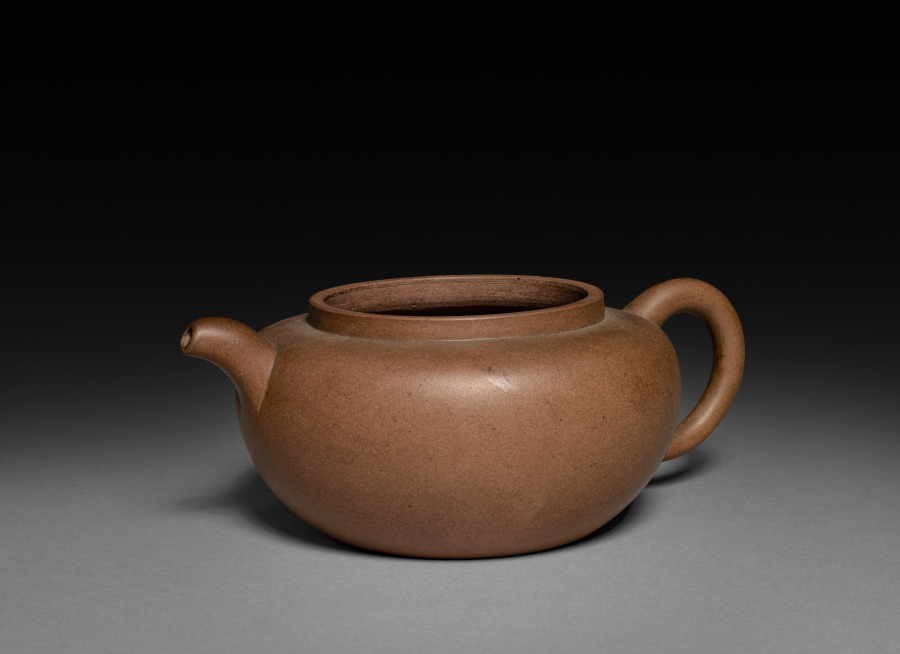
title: Teapot: Yixing ware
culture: China, Qing dynasty (1644-1911)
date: 1644–1911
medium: stoneware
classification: Ceramic